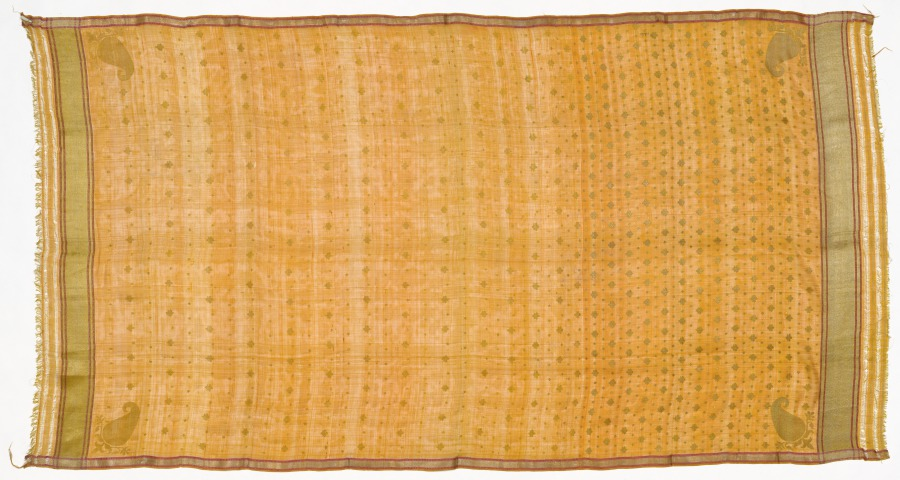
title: Sari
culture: India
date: 1900–1950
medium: brocade; silk and metal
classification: Textile